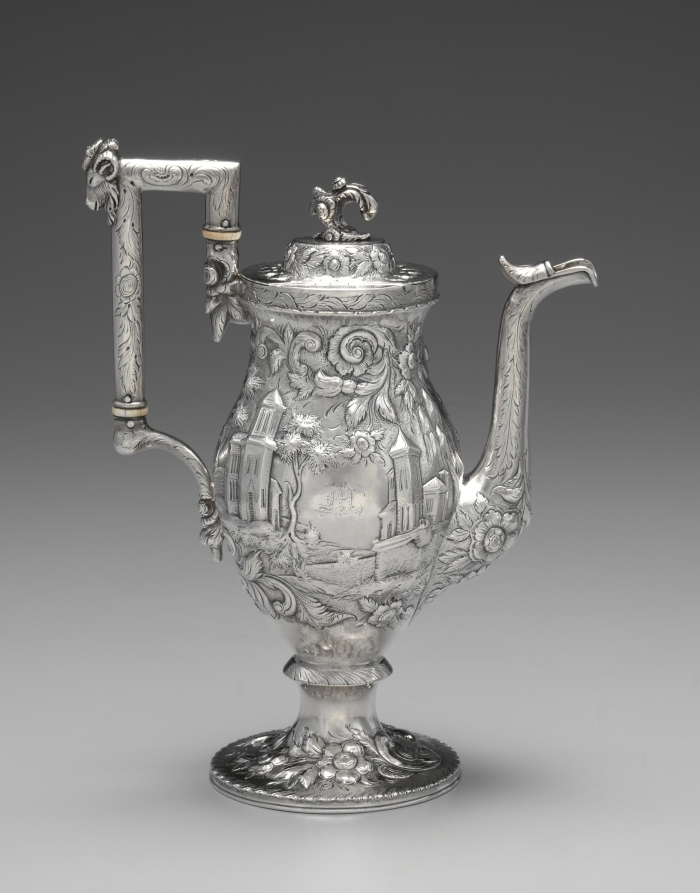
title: Neo-Rococo Coffee Pot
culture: America, Baltimore, 19th century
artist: Samuel Kirk (American, 1793–1872)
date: c. 1840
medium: silver and ivory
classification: Silver